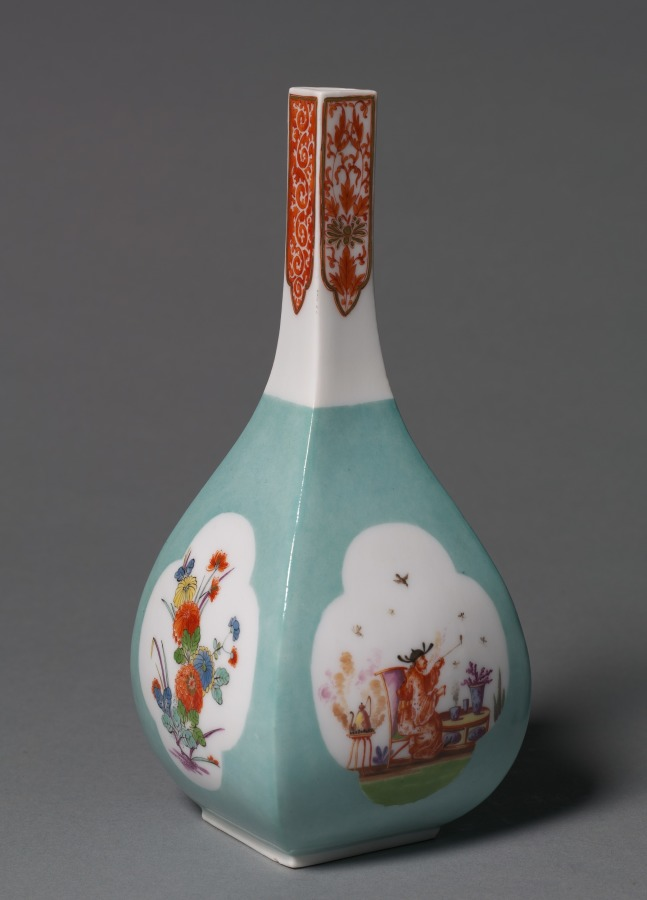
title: Saki Bottle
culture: Germany, Meissen, 18th century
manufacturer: Meissen Porcelain Factory (German, est. c. 1710)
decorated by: probably by Johann Gregor Herold (German, 1696–1775)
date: c. 1730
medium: porcelain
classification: Ceramic